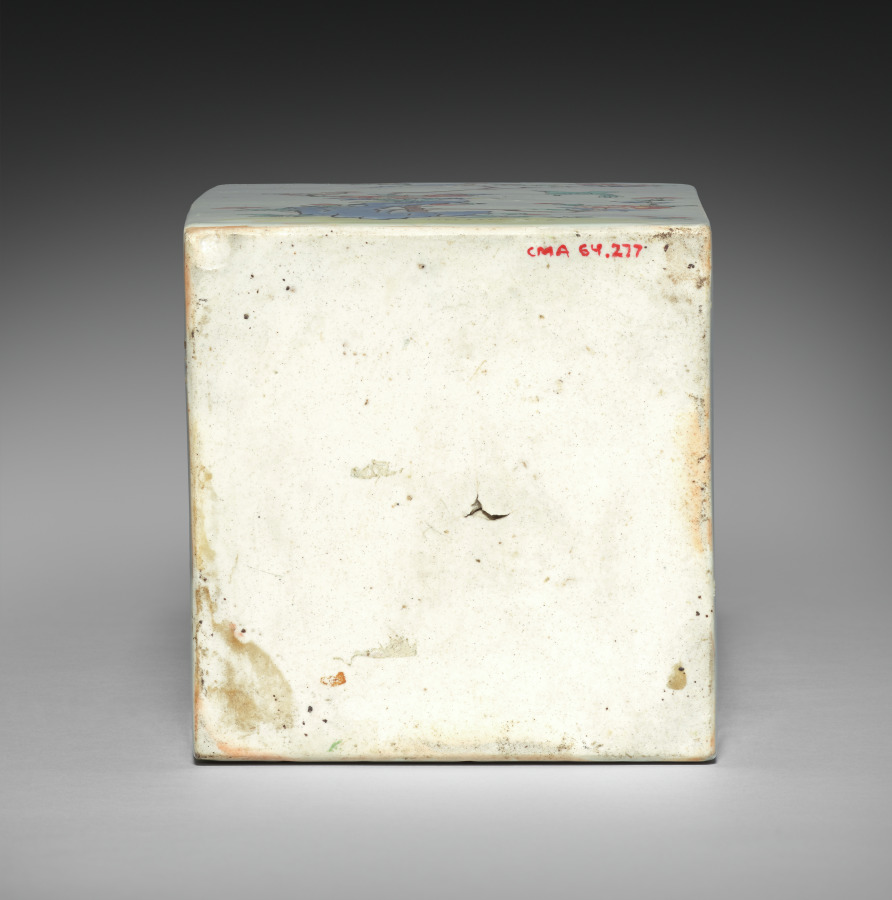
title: Square Jar with Birds and Flowers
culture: Japan, Edo period (1615–1868)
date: late 1600s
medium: Porcelain with overglaze color enamels and gold (Hizen ware, Kakiemon type)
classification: Ceramic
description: This lidded square jar was likely paired with a complementary yet nonidentical mate. The pine tree, plum, and bamboo together form the frequently depicted motif known as the Three Friends of Winter (shōchikubai), so named because of their hardy perseverance in the cold. Each side also features a pair of birds, including cranes on one face and pheasants on another.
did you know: A jar like this was fired at a high temperature, painted with colored enamels, and then fired again at a lower temperature.